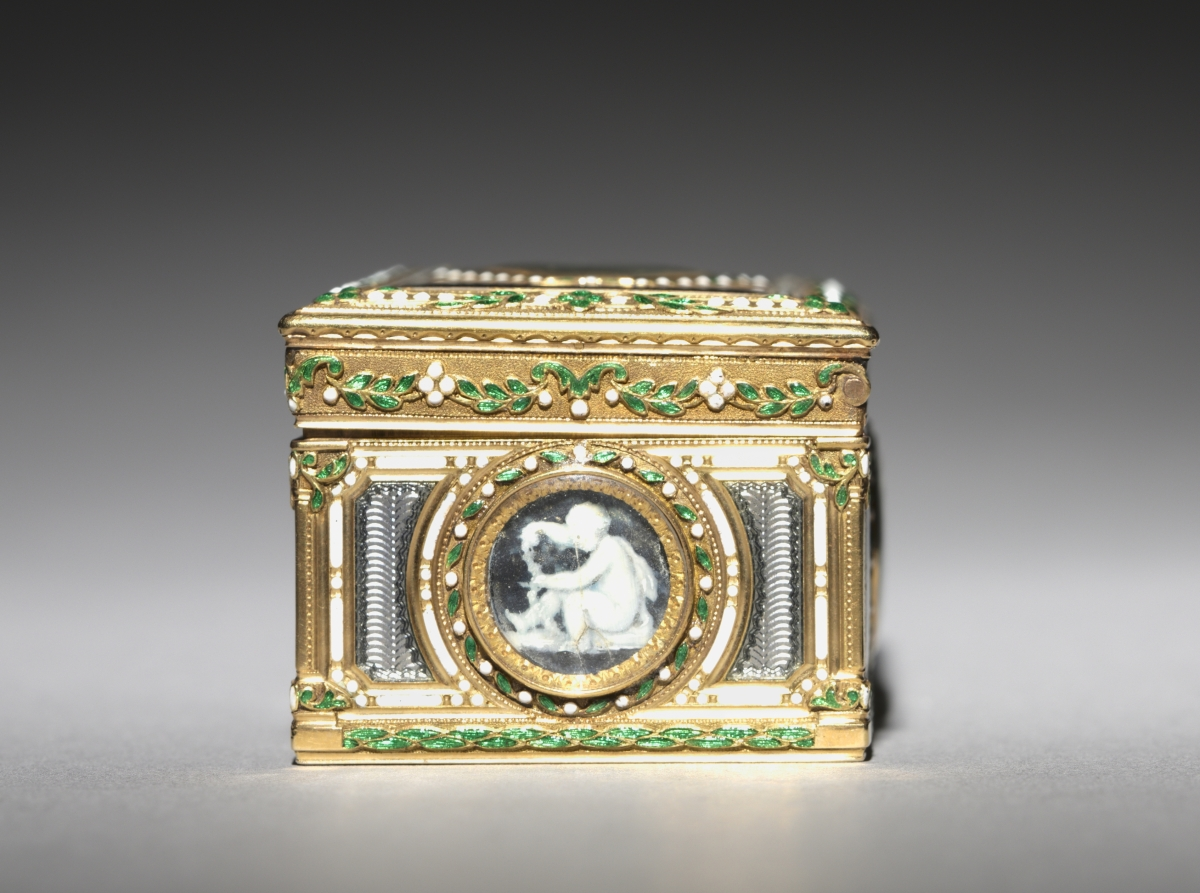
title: Snuff Box (Tabatière)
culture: France, 18th century (style of Louis XVI)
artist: François Chazeray (French)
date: 1777–78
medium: gold and enamel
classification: Metalwork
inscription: [Maker's mark of François Chazeray, master goldsmith in 1760, cover; bottom; front wall]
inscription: [Warden's mark (probably a crowned "O"), Paris, 1777-1778, cover; bottom; front wall]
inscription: [Illegible mark, bottom]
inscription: [Illegible mark, cover]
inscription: [Illegible charge mark, inside front]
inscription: [Discharge mark of Jean-Baptiste Fouache, Paris, 1774-1780, on neck at left.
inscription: [Outside of neck, modern inscription '4 (modern inscription]:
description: This box is decorated with figures of antiquity associated with love: winged cupids, dancing nymphs, and representations of the Greek goddess of love. These scenes are inspired by antique cameos, intricately carved gemstones crafted in ancient Greece and Rome. This interest in ancient iconography, symmetry, and classical compositions of gods and goddesses was characteristic of 18th-century neoclassicism.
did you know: Decorated with allegorical scenes of love, it is likely that this box was a present between lovers.